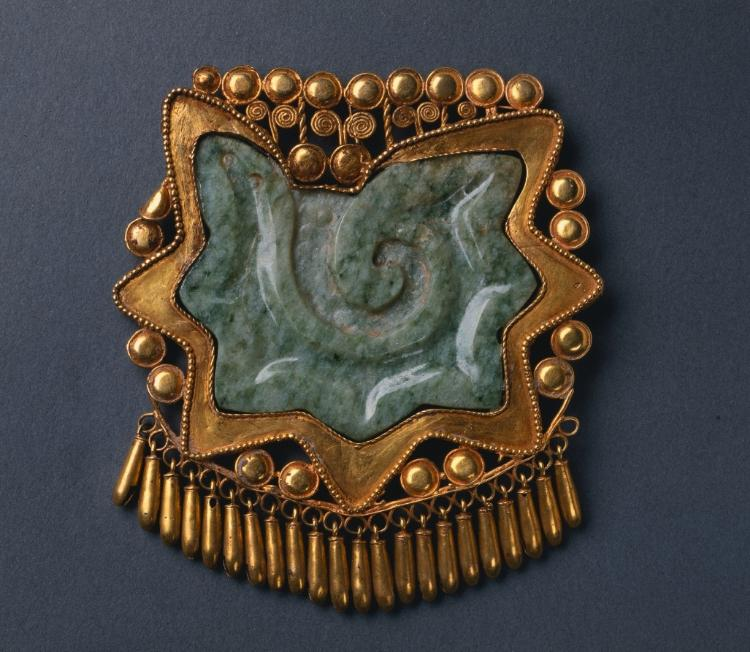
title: Pectoral Ornament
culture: Mexico, Guerrero, Ichcatiopan, Mixtec or Aztec style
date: c. 1200–1519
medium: gold, jadeite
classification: Jewelry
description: This extraordinary pendant consists of a conch shell section carved in jade, enclosed in a delicate gold frame with tiny dangling bells. This symbol was worn by the deity Quetzalcoatl (Feathered Serpent), a culture hero credited in one myth with creating human life by sprinkling his blood on ground bones. The pectoral may have been worn by a priest, or by a ceremonial impersonator of Quetzalcoatl.